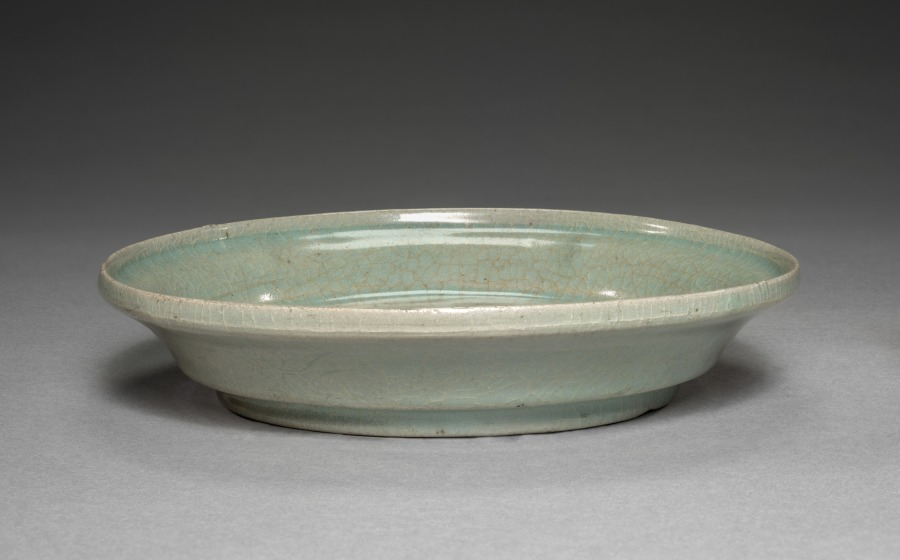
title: Saucer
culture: Korea, Goryeo dynasty (918–1392)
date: 1100s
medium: pottery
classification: Ceramic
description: As early as the seventh century, the practice of drinking tea and wine became an important part of elite culture in Korea. Elites of the Goryeo period commissioned a variety of types of utensils and vessels including this saucer paired with a large bowl, to make their drinking experience more exciting.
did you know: The crackle pattern that appears all over this saucer was caused by a thermal expansion mismatch between the body and the glaze.